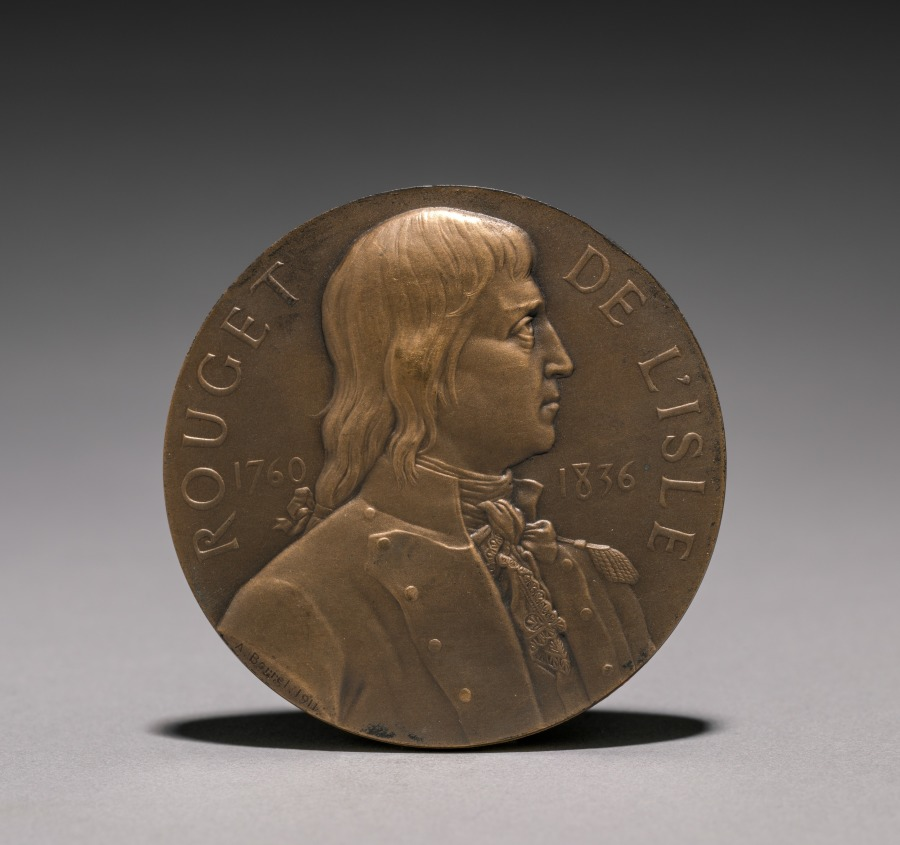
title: Medal of Claude Joseph Rouget de L'Isle (1760-1836) (obverse)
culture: France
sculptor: Alfred Borrel (French, 1836–1927)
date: 1911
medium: bronze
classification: Metalwork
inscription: Obverse: raised inscription: ROUGET DE L'ISLE 1760 1836; inscribed lower left: A. BORREL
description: The French sculptor and medalist Alfred Borrel (1836-1927) created this portrait medal to commemorate the 75th anniversary of Rouget de L'Isle's death in 1836, the same year in which the sculptor was born.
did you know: Claude Joseph Rouget de L'Isle composed the French national anthem, La Marseillaises, in 1792 in Strasbourg after France had declared war on Austria.